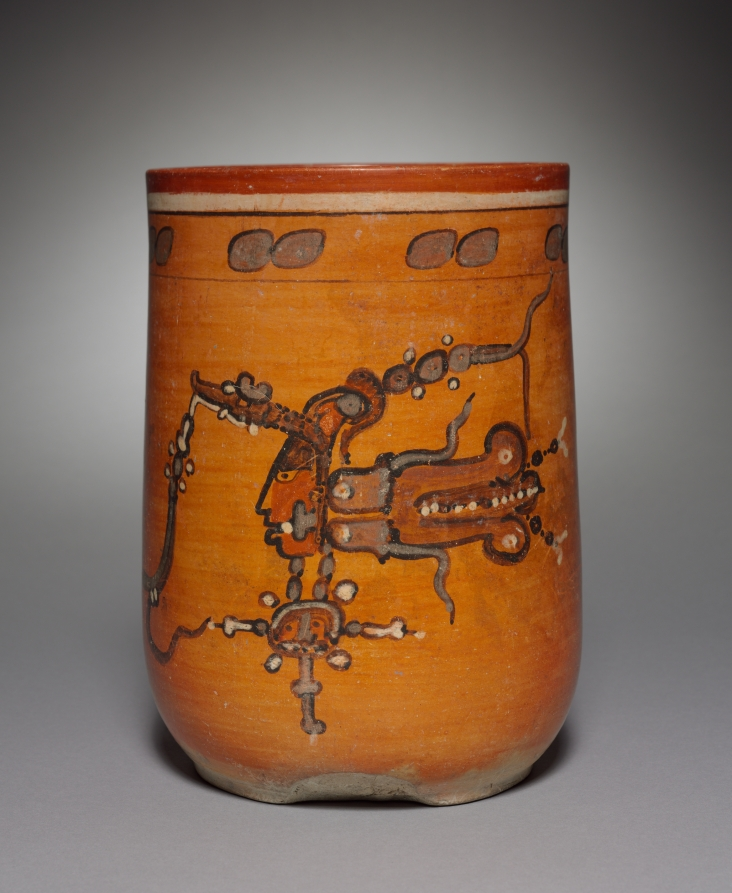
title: Vase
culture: Mexico, Maya, Campeche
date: 250–900 CE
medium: earthenware with colored slips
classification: Ceramic